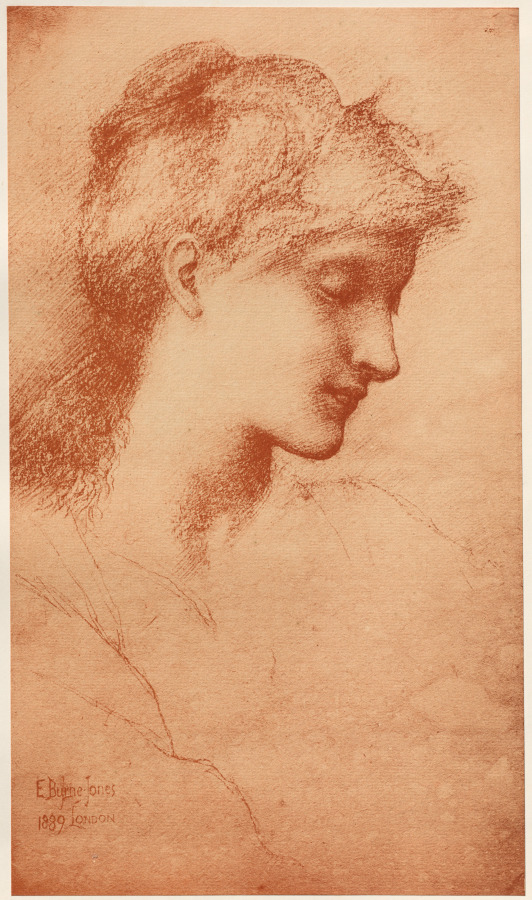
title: Beauty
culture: France, 19th century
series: L'Estampe Moderne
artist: Edward Burne-Jones (British, 1833–1898)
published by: Imprimerie Champenois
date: 1887–1889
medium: Color lithograph from bound volume containing 50 lithographs, each with a tissue paper guard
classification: Bound Volume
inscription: In plate: lower left corner of image: E.Burne-Jones / 1889 LONDON; lower right corner of secondary support: blindstamp of l'Estampe Moderne: (Lugt 2790); watermark, center right of sheet: VD&L inscribed within four decorative flourishes which together create a circle formation.